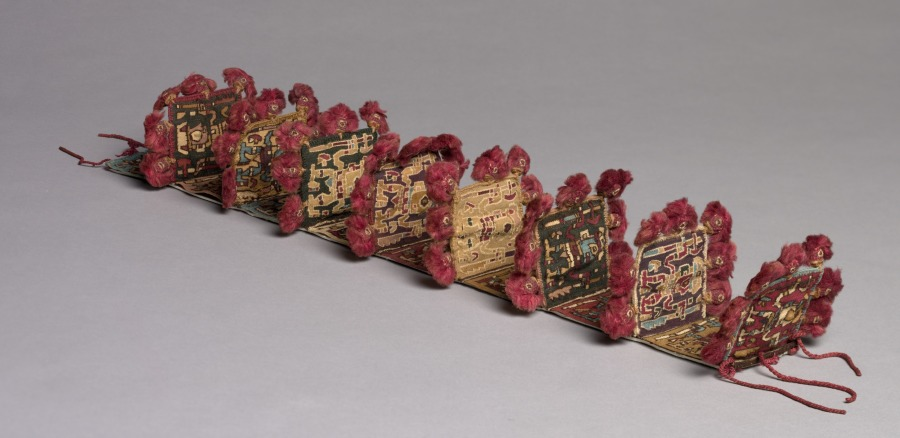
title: Band (Headband?)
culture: Central Andes, Moche-Wari Style, mid-7th to mid-9th century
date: c. 650–850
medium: Camelid fiber (alpaca; weft) and cotton (warp); tapestry weave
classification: Textile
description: This jewel-like textile, perhaps the only one of its kind, is made from a single band accordion-folded to form tabs, each edged with lush red tassels. Repeated in different colors down its length is the image of a warrior who holds an axe in one hand and a jagged, club-like object in the other. The reversed orientation of several of the warriors may be the result of the weaving method.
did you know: This unusual band may have been worn as a headband.